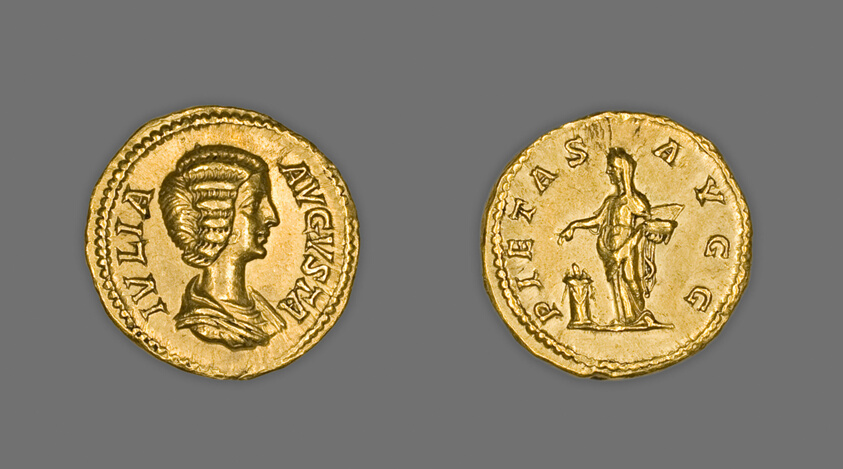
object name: Coin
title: Aureus (Coin) Portraying Empress Julia Domna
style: severan, imperial (roman), ancient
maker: Roman, minted in Rome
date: 196-211, issued by Septimius Severus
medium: Gold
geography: Rome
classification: coin; ancient art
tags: portraits